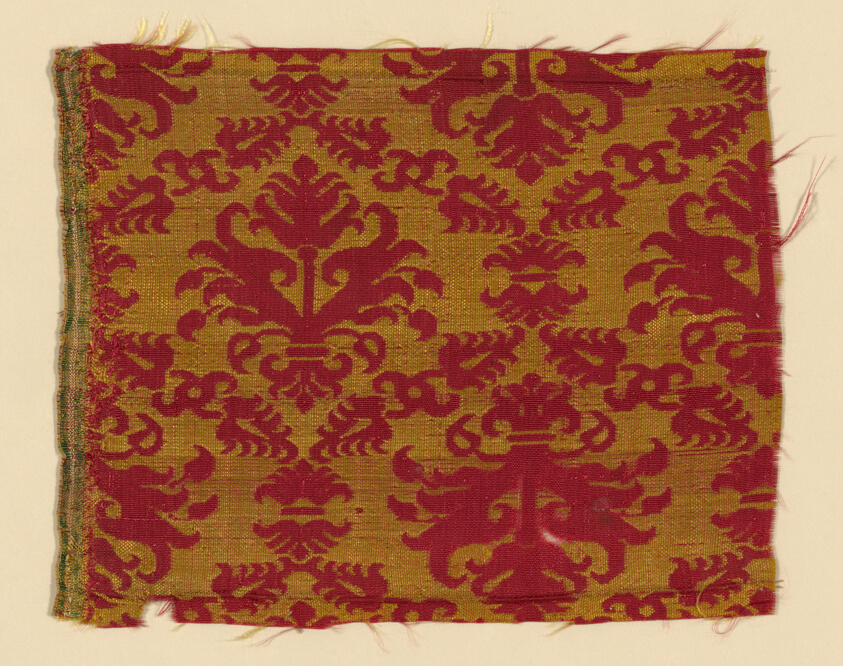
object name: Textile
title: Fragment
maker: Italy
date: 1575/1600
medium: Plain compound cloth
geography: Italy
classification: textile; weaving